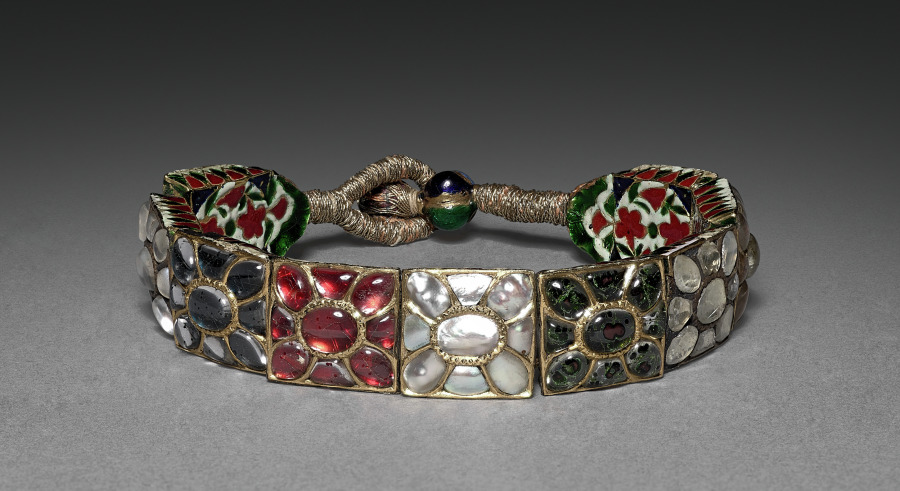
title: Armlet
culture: India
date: 1800s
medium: silver gilt with semiprecious stones and enamel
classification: Jewelry